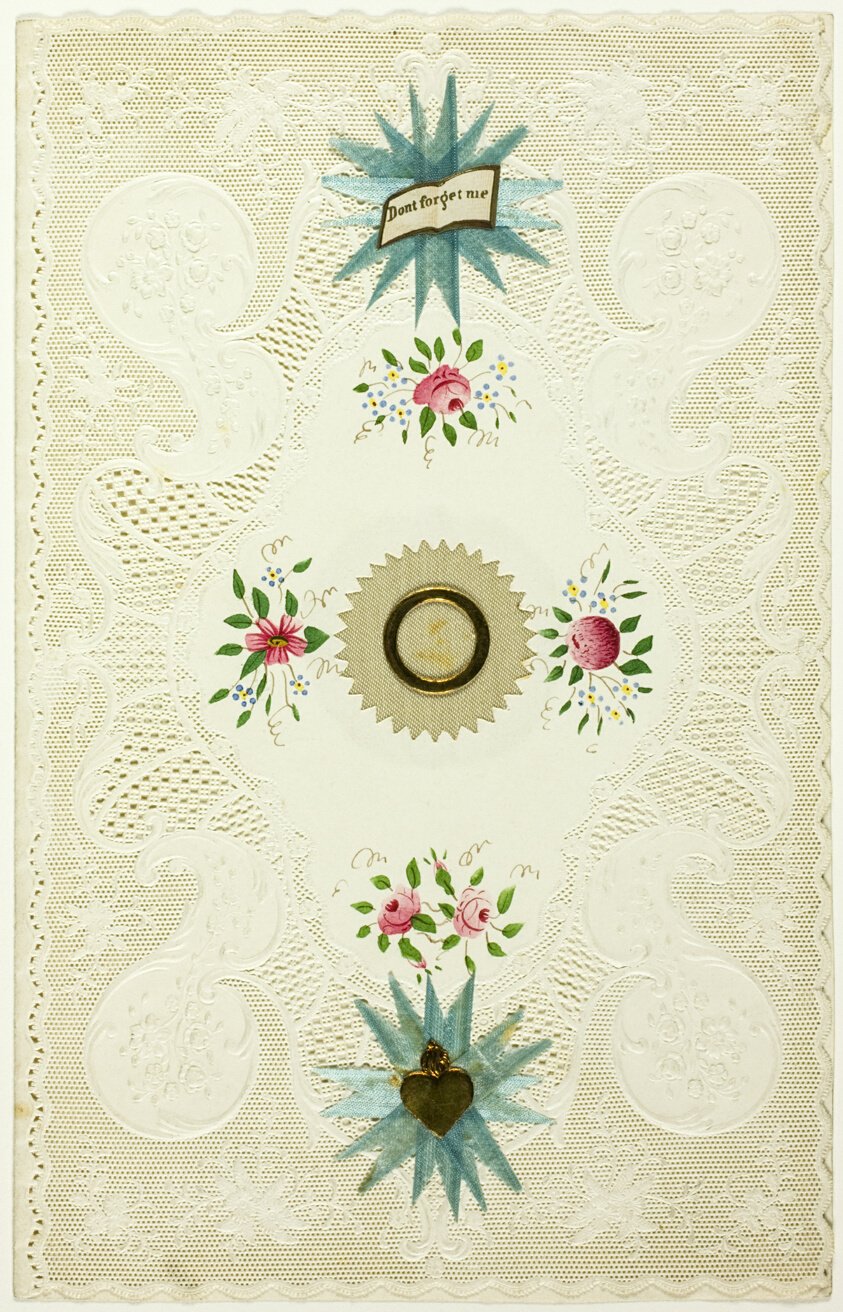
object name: Drawing and Watercolor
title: Don't Forget Me (valentine)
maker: Joseph Mansell (English, 19th century)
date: 1845/50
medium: Collaged elements and watercolor on cut and embossed ivory wove paper (lace)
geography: England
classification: collage; valentine; prints and drawing; paper